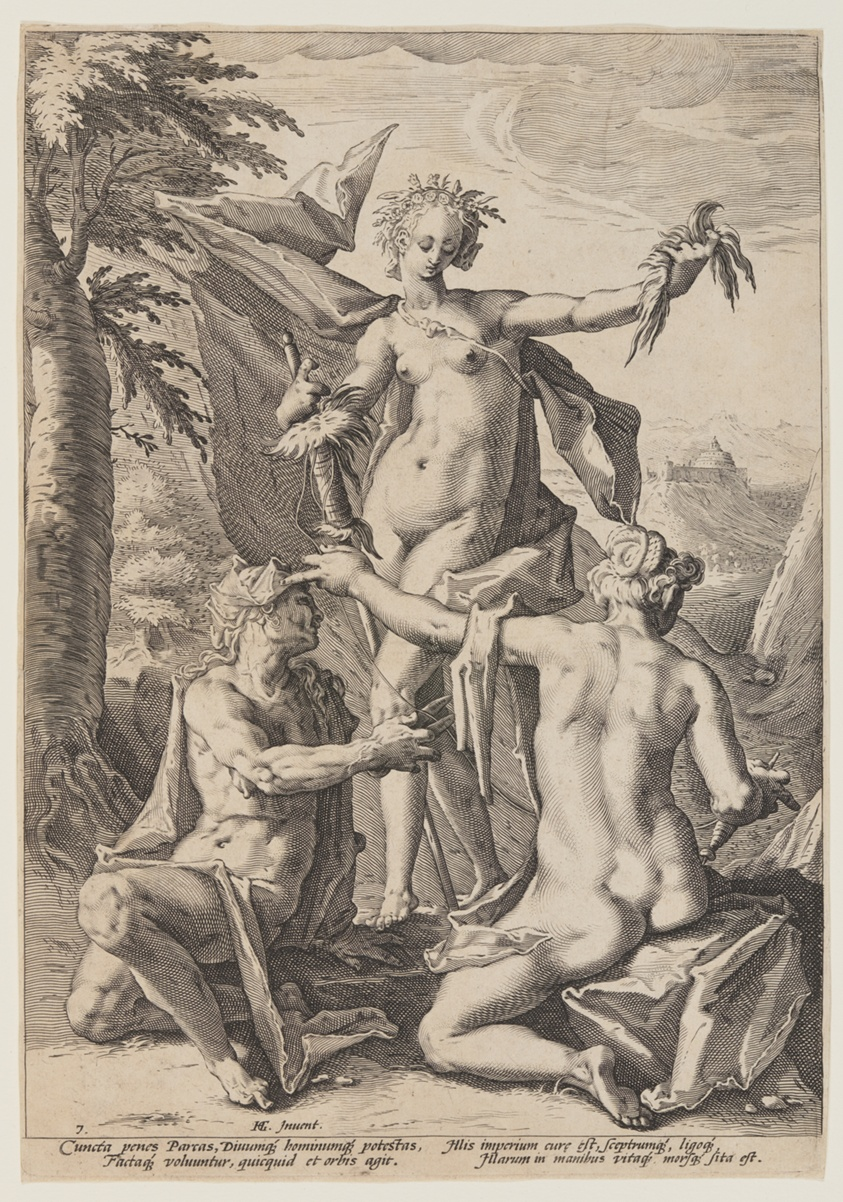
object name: Print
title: The Fates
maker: Jacob Matham (Dutch, 1571–1631); after Hendrick Goltzius (Dutch, 1558–1617)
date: c. 1600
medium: Engraving on ivory laid paper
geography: Netherlands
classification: print; paper; prints and drawing; engraving